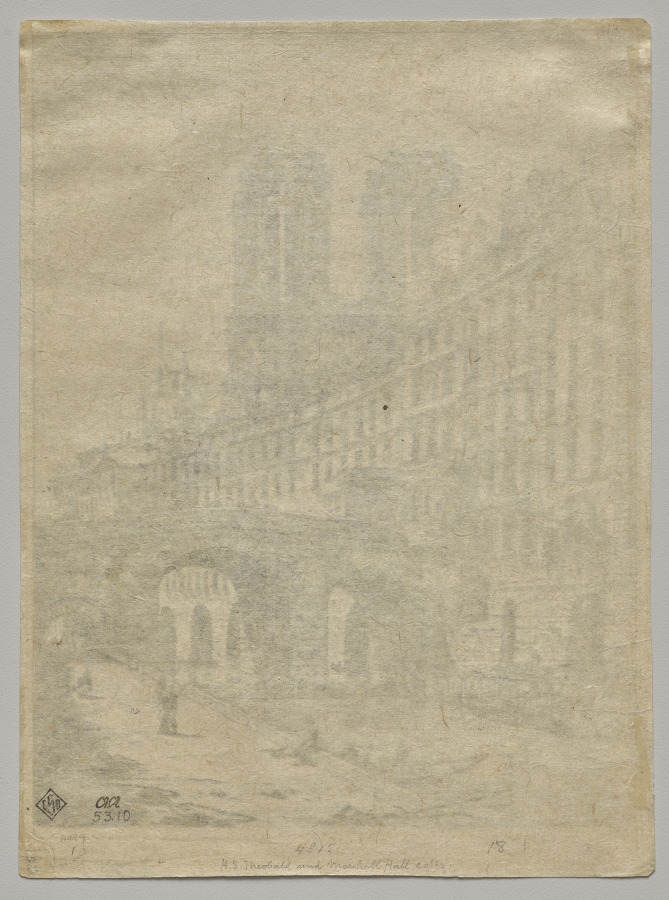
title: Petit Pont, Paris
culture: France, 19th century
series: Etchings of Paris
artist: Charles Meryon (French, 1821–1868)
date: 1850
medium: etching with engraving on Japanese paper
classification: Print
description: Charles Meryon used etching—a technique that involves drawing on a printing plate with a needle’s point—to create minutely detailed images of Paris that imaginatively present recognizable sites. This print features bateaux-lavoirs (wash boats) on the Seine River, where laundresses could purchase a spot to do their washing. The boats appealed to Meryon, who was fascinated by Paris’s gradual transformation. Since they attracted crowds of working-class women, administrators considered the boats unsightly and unhygienic, repeatedly pushing them closer to the city’s outskirts until few remained by the end of the 1800s.